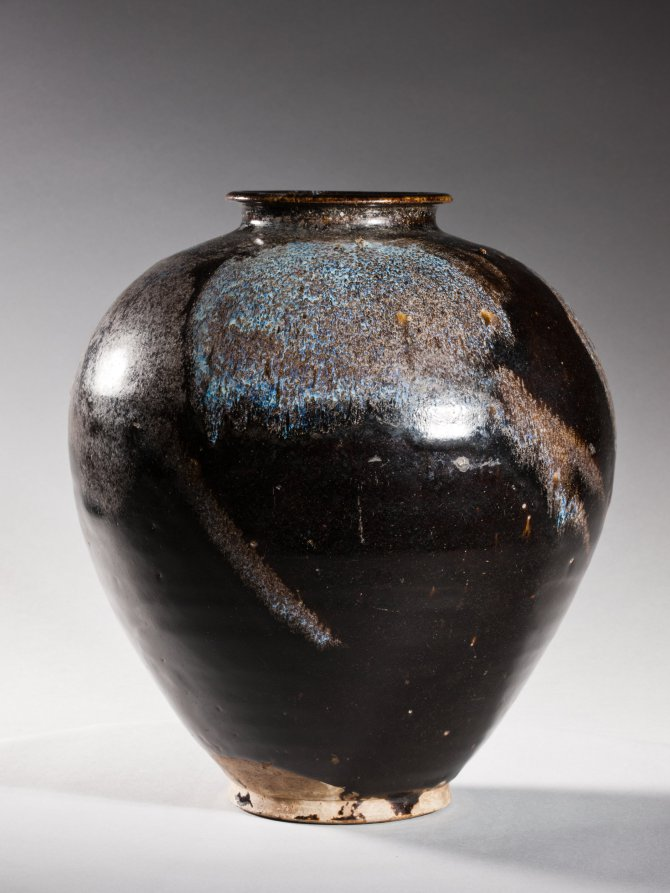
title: Jar: Black Ware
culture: China, Henan province, Huangdao kilns, Tang dynasty (618-907)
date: 700s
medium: glazed stoneware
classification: Ceramic